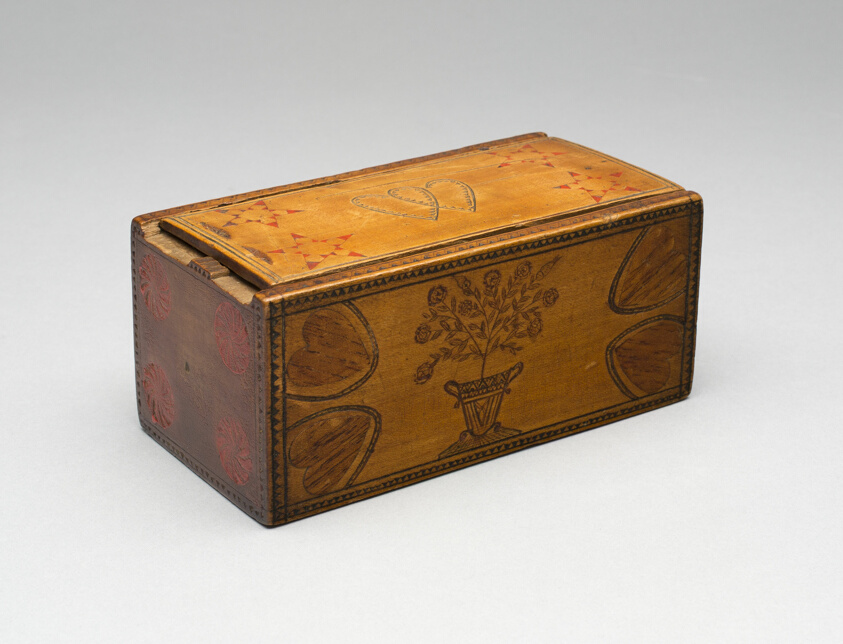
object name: Decorative Arts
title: Box with Sliding Lid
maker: Artist unknown (American, active 18th–19th century)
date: c. 1800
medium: Maple and paint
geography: United States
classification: case furniture; box; furniture; american decorative arts; american arts; decorative arts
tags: furniture